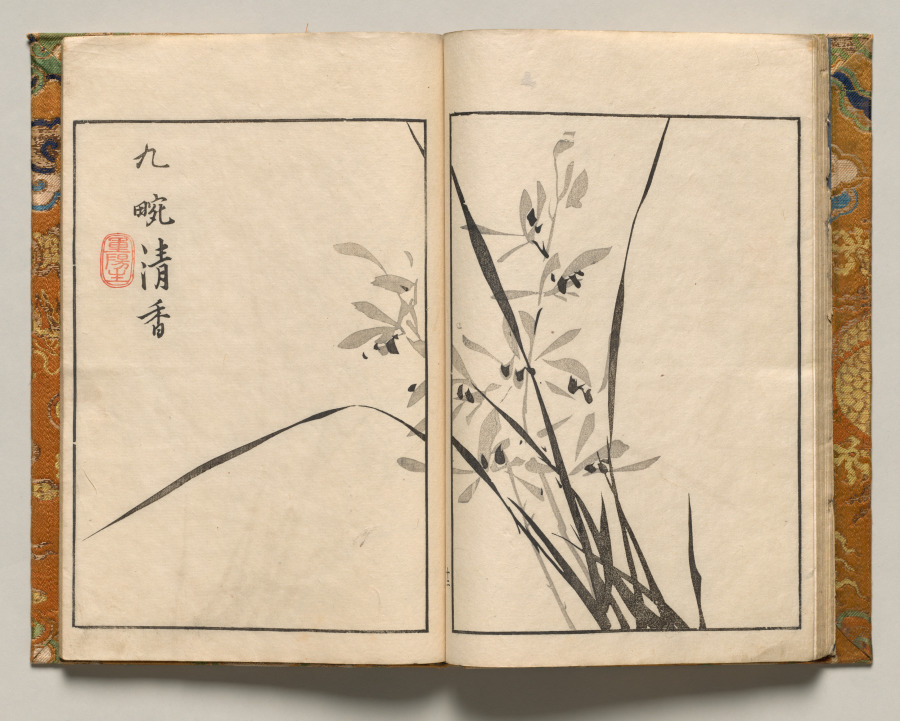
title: Pure Scent of Orchids, Design Twelve from Shazanrō Picture Book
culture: Japan, Edo period (1615–1868)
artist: Tani Bunchō (Japanese, 1763–1841)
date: 1816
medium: woodblock-printed book; ink and color on paper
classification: Bound Volume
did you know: Shazanrō was one of Tani Bunchō's style names.